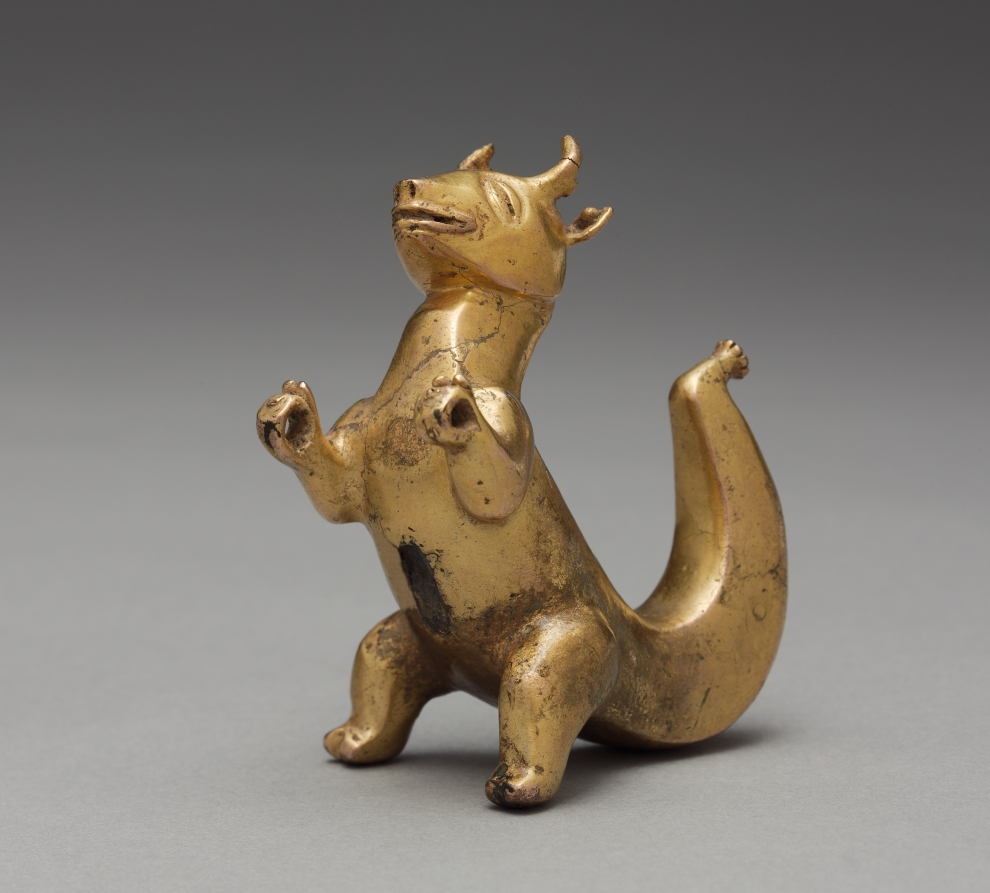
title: Pendant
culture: Panama, International style, 5th-7th century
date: 400–700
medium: cast gold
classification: Metalwork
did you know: Panning for gold was viewed as a sacred activity among the ancient inhabitants of Costa Rica and Panama.